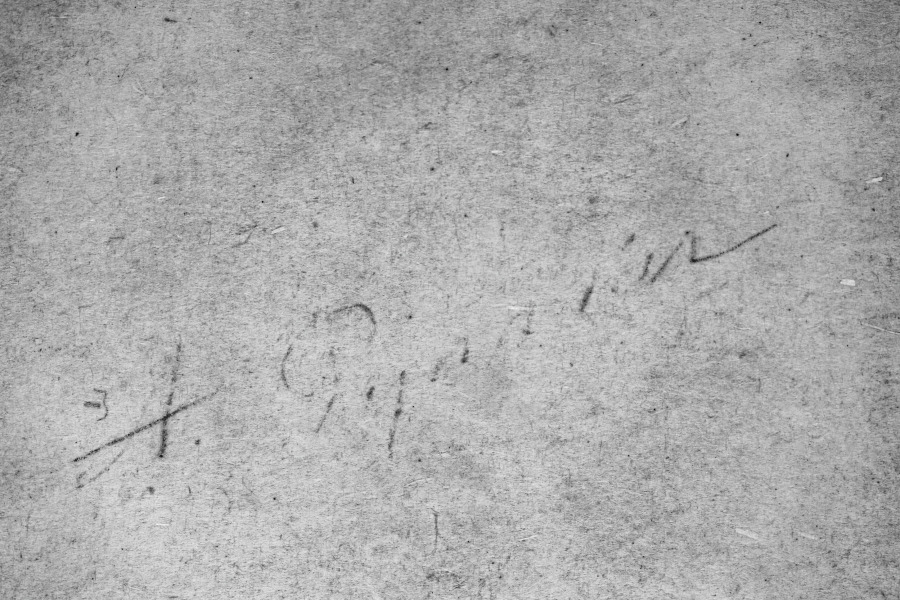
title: Wooded Landscape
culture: Netherlands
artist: Anthonie Waterloo (Dutch, 1609/10–1690)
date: after 1648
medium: Charcoal applied wet, brush and black and brown and white washes; black ink framing line on antique brown laid paper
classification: Drawing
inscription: On verso, pen or graphite inscription (erased?) A. Pynnier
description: Known exclusively for his drawings and prints, the Dutch artist Anthonie Waterloo specialized in tree studies and dense forest scenes such as this drawing. Here he created a vista through groupings of tall trees, producing the effect of shimmering light and movement with his unique technique of using wet charcoal over dry chalk. He added a subtle white wash throughout the center of the composition to create the hint of the sun’s glow beyond the trees. Such a work would have been sold as a finished work of art.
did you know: Studies of dense forests and individual trees were a specialty of Dutch artists in the 1600s.